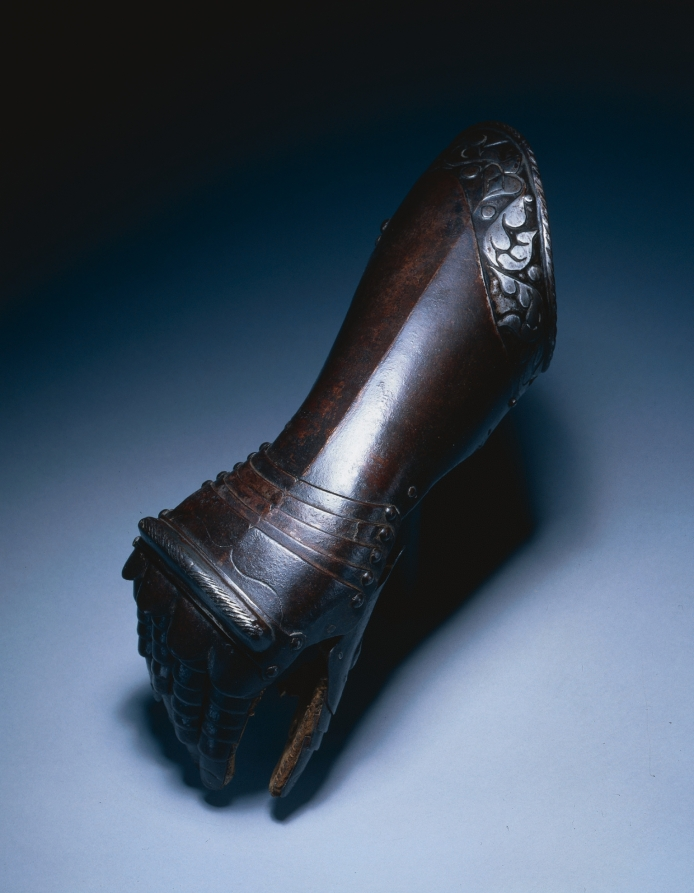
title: Black and White Elbow Gauntlet for the Right Hand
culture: North Germany, 16th century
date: c.1570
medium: steel, blackened with leather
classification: Arms and Armor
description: Plate armor alternately decorated with brightly polished ("white") and darkened ("black") surface areas is commonly referred to as "black and white" armor. The black color results from painting the surface areas, or merely leaving them dark from the forging process. The gauntlet here has been further embellished with an embossed cuff. The 1500s saw the revival of this ancient technique also known as repoussé. First the pattern is drawn onto the surface and then hammered and punched from the inside to gradually shape the desired raised design on the outer surface of the metal. This technique was reserved for only the costliest of armors.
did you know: To throw a gauntlet or armored glove at the feet of your enemy or opponent was a grave insult, one only to be matched with personal combat. This is where we get the modern phrase "throw down the gauntlet."